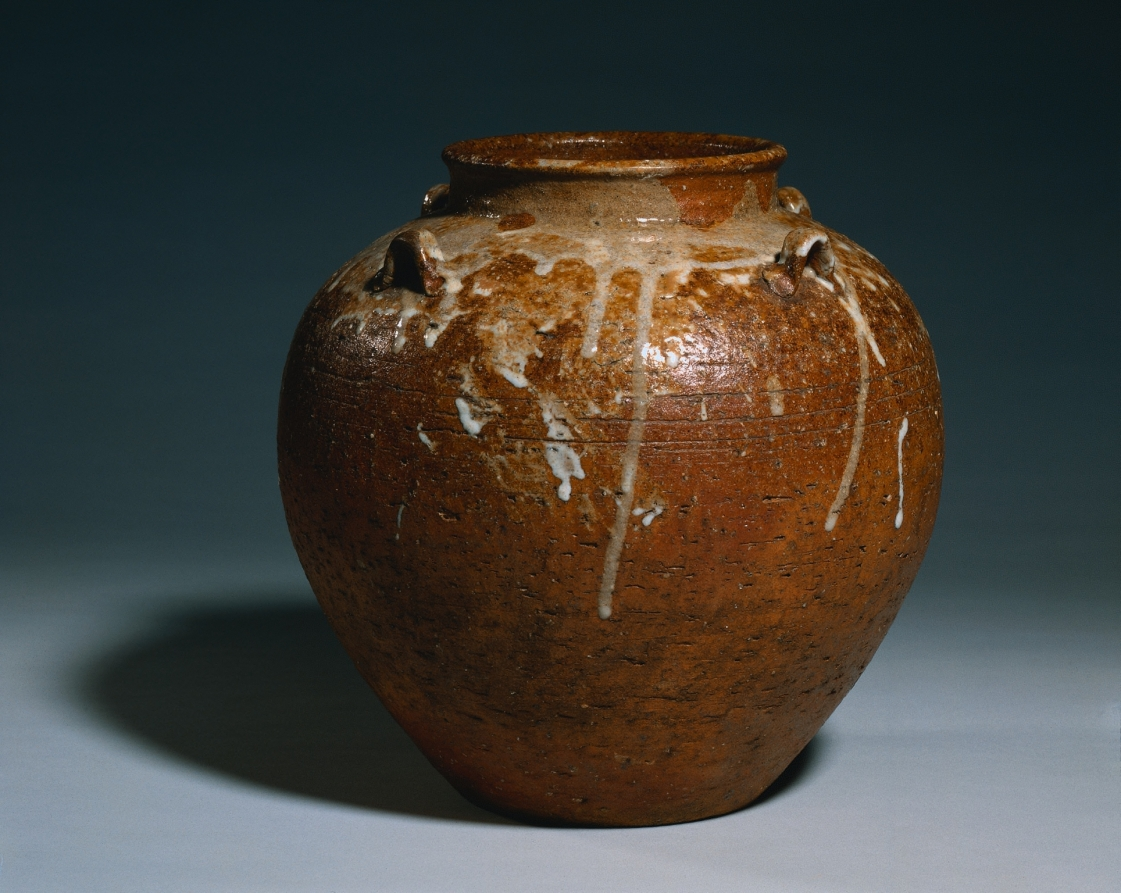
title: Tea Storage Jar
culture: Japan, Edo period (1615–1868)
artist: Nonomura Ninsei (Japanese, active 1640s–90s)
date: mid- to late 1600s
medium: Stoneware with white glaze (Shigaraki style)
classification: Ceramic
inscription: Ninsei seal impressed in the clay on bottom.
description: In this tea storage jar, Nonomura Ninsei reinterpreted a Shigaraki stoneware—made to hold agricultural products and known for its warm orange color, asymmetrical round forms, and irregular natural ash glazes—to produce a more refined piece that would appeal to tea masters seeking a touch of rusticity. In Japanese tea culture, hanging scroll paintings or calligraphy are placed in the tokonoma, or viewing alcove, for participants to admire and discuss along with the utensils used in the gathering. The scrolls are typically paired with vessels containing seasonal floral arrangements.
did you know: This jar may be considered an example of the aesthetic known as kireisabi, or refined rusticity.